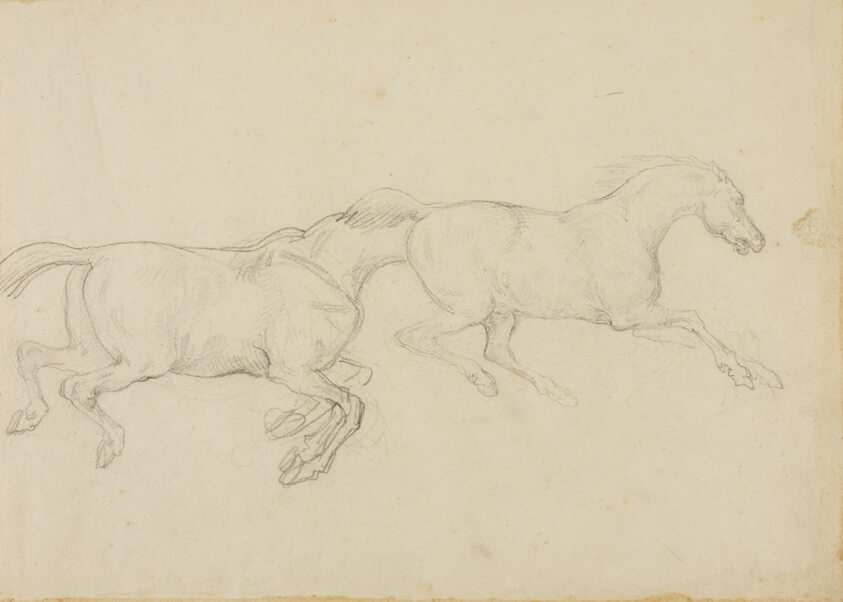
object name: Drawing and Watercolor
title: Two Horses Galloping to the Right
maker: Jean Louis André Théodore Géricault (French, 1791-1824)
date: 1818/19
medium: Graphite, on cream wove paper, perimeter mounted on cream wove paper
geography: France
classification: graphite; drawings (visual works); prints and drawing